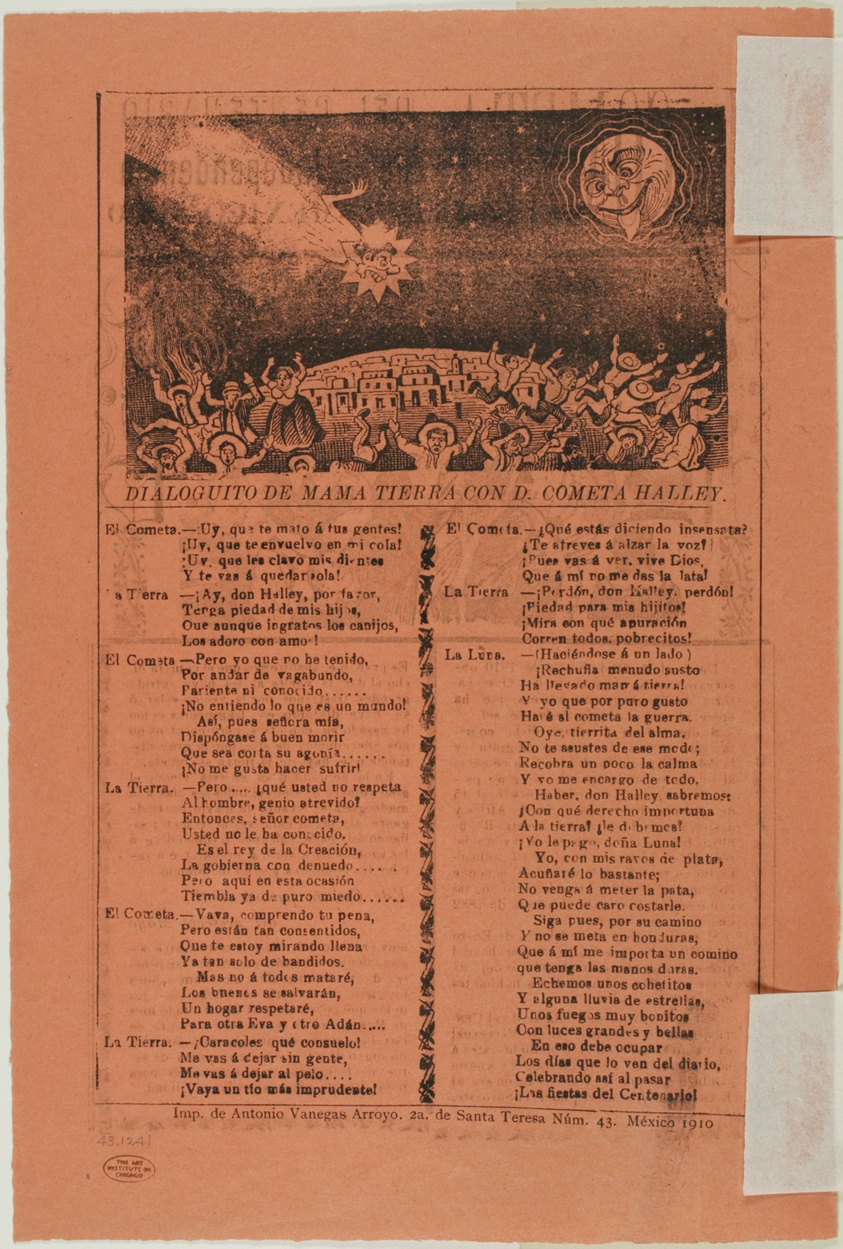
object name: Print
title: The Comet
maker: José Guadalupe Posada (Mexican, 1852-1913)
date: 1899, published 1910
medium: Double-sided relief engraving on zinc on paper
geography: Mexico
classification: woodcut; print; prints and drawing